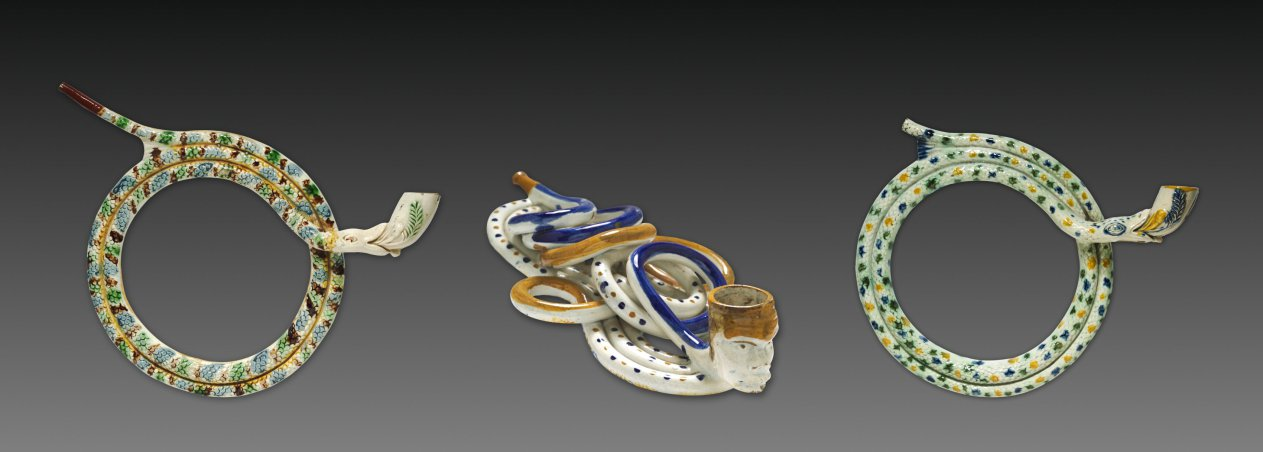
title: Pipe in the Form of a Coiled Snake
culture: England, Staffordshire, late 18th-early 19th Century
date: 1780–1820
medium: lead-glazed earthenware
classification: Ceramic